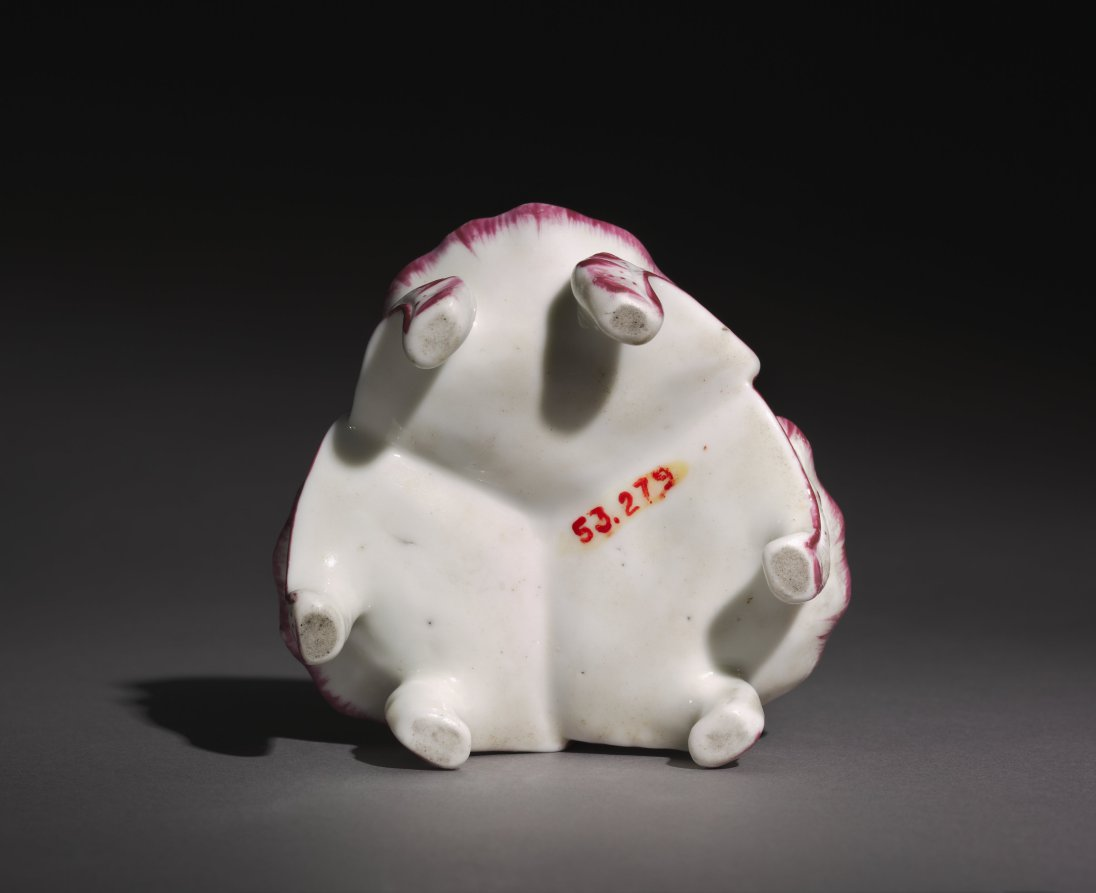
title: Triple Salt Cellar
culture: France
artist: Mennecy Factory (French)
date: c. 1765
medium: Soft-paste porcelain with enamel decoration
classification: Ceramic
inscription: [Incised]: DV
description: In 16th-century France, salt was costly and often displayed in exceptionally designed and decorated salt cellars that reinforced wealth and status. Still elegantly designed and ornamented, this triple salt cellar is small, a result of the decreasing decorative and symbolic importance of salt in the latter half of the 1700s. With its floral decoration and whimsical monkey-shaped handle, this object’s design is characteristic of the Rococo style.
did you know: This triple salt cellar might have held a variety of ingredients including powdered spices, celery or garlic salt.